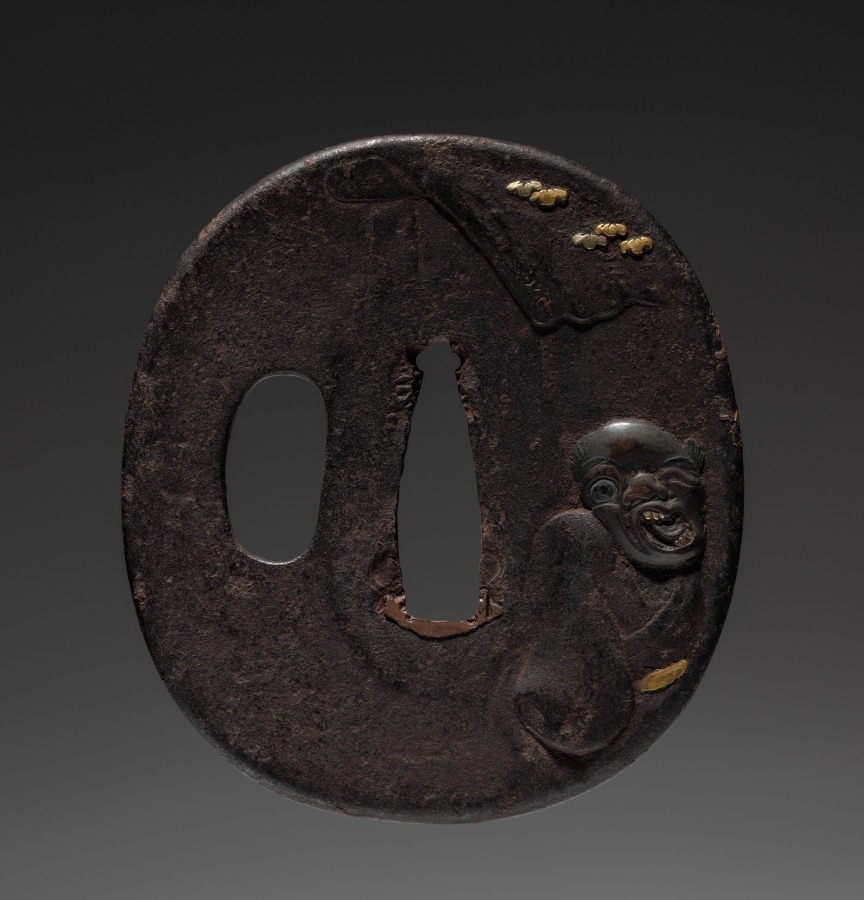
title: Sword Guard (Tsuba)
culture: Japan, possibly Edo period (1615-1868)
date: c. 1615–1868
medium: iron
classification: Arms and Armor